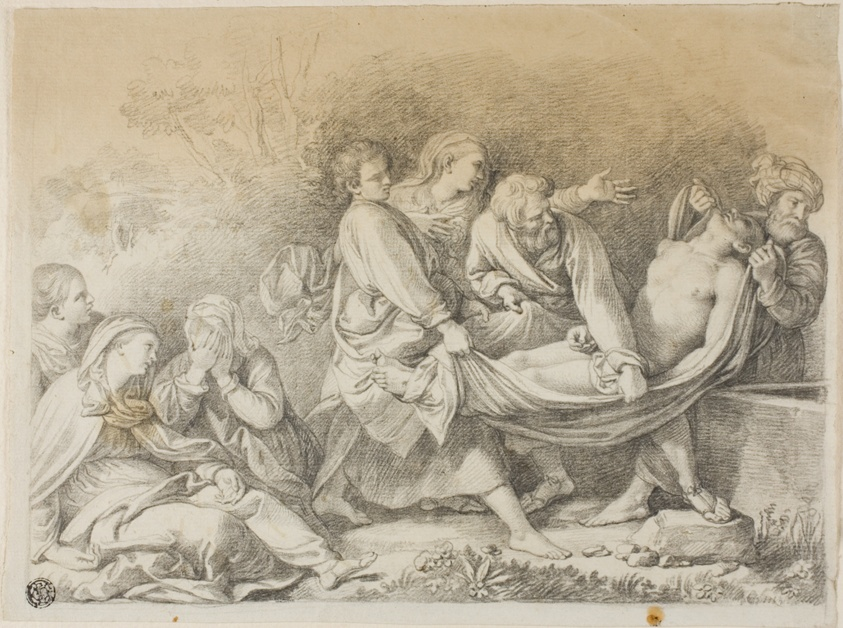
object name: Drawing and Watercolor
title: Entombment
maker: Michael Kock (Austrian, 1760-1825); or after Annibale Carracci (Italian, 1560-1609)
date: 1792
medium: Black chalk on ivory laid paper, tipped onto ivory laid paper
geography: Austria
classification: graphite; drawings (visual works); prints and drawing